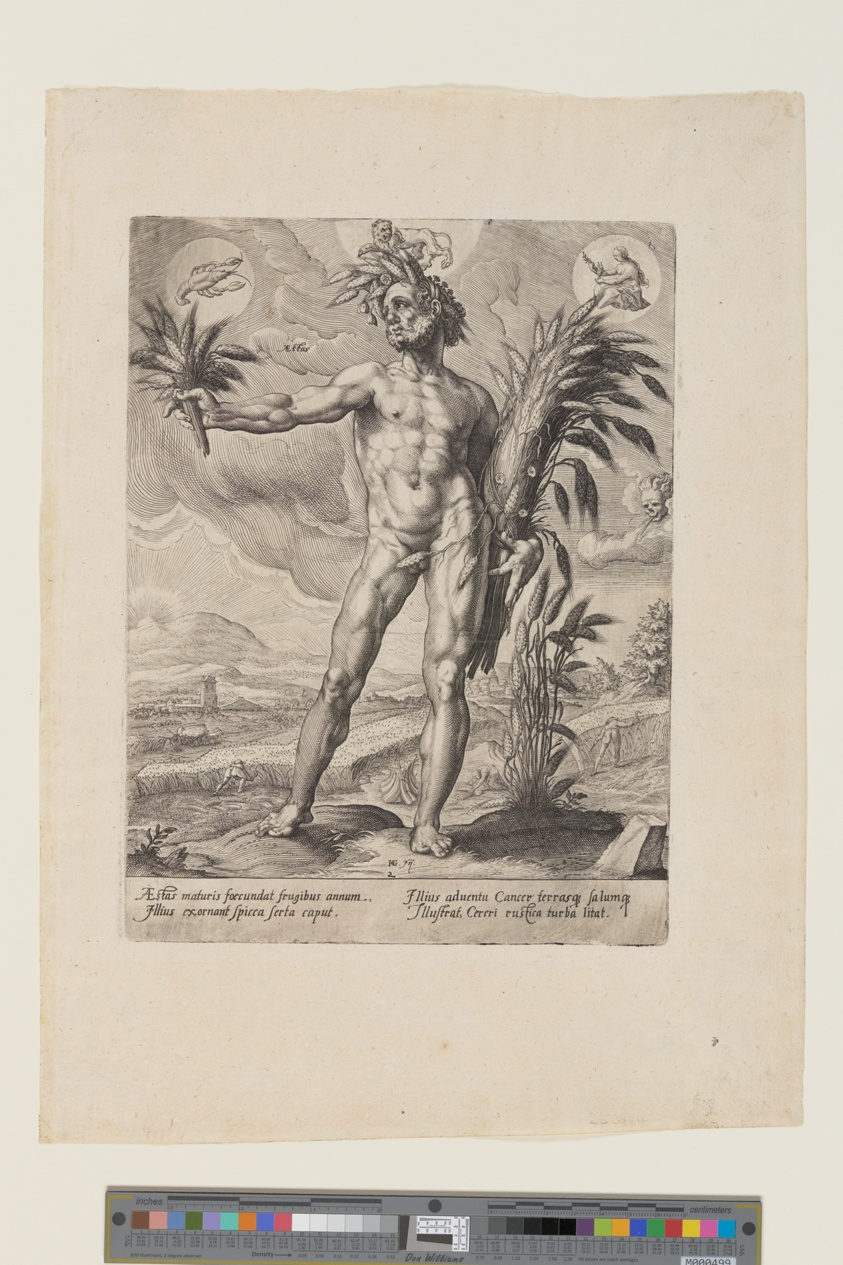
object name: Print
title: Summer, from The Four Seasons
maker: Matthäus Greuter (German, 1564 or 1566–1638); after Hendrick Goltzius (Dutch, 1558–1617)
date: c. 1589-1600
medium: Engraving on ivory laid paper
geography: Germany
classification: engraving; paper; print; prints and drawing